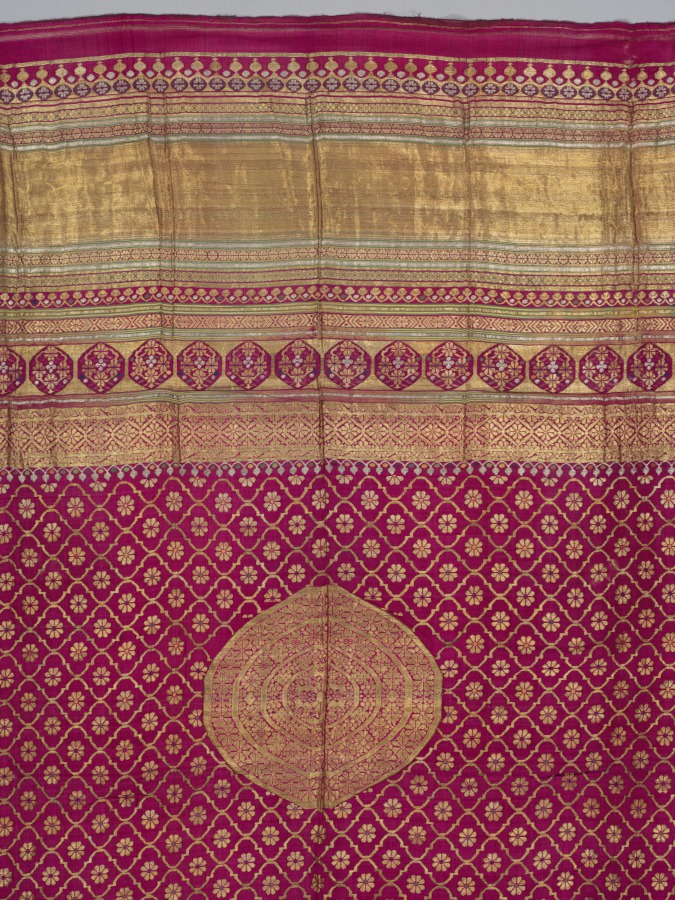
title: Fragment of Gold Cloth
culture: India, 19th century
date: 1800s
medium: brocade; silk, gold and silver threads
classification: Textile